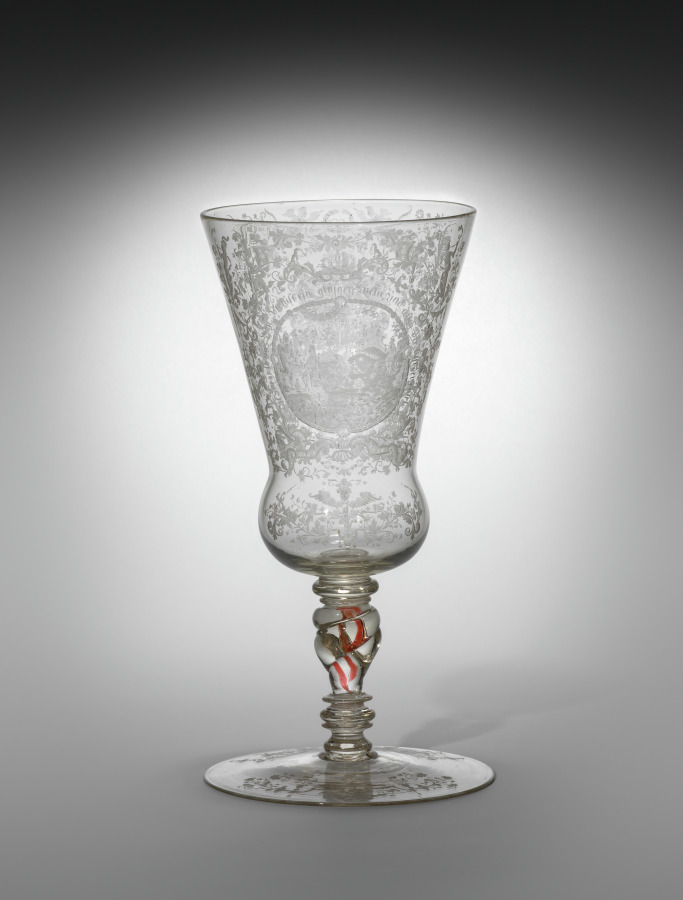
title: Standing Cup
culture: Bohemia, 18th century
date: c. 1715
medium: glass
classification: Glass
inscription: the German inscription engraved around the hunting scene translates as: When sorrow torments us enjoy a glass of wine and also the joy of a hunt; engraved on the opposite side: F.A.K.J.P.V.C.F.Z.S. (Friedrich August Keonig in Polen und Chur Fuerst zu Sachsen).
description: Engraved with arms of Saxony-Poland and Hunting Scene.